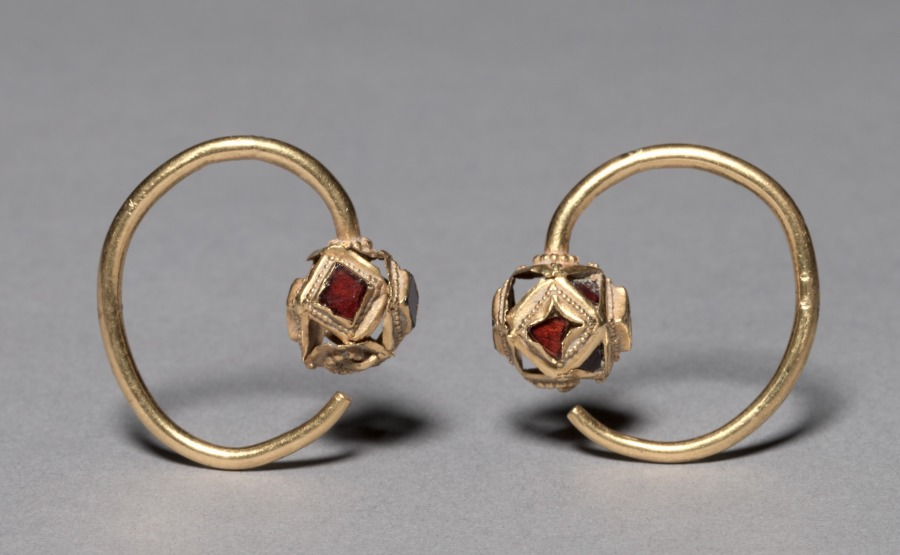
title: Earrings (pair)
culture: Ostrogothic, Migration period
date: 400s CE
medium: gold with garnets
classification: Jewelry